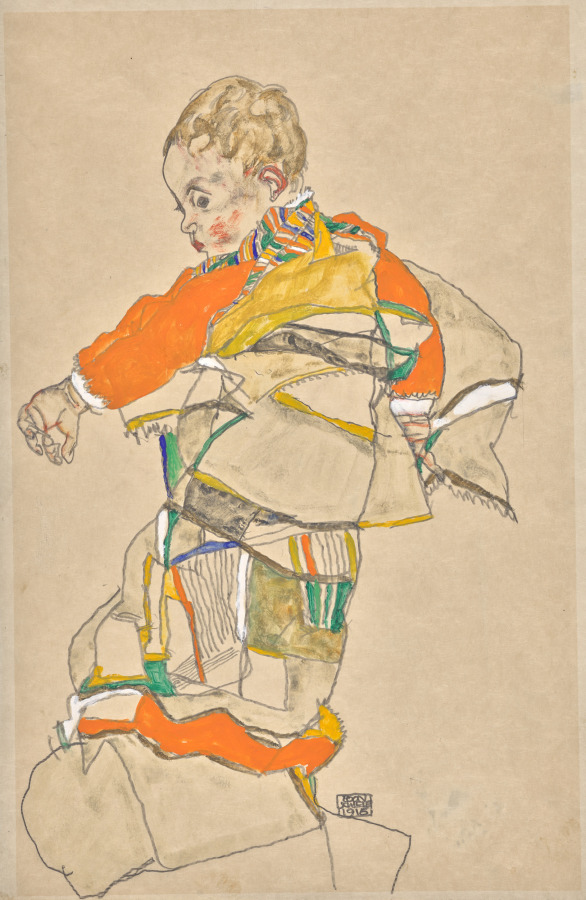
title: Portrait of a Child (Anton Peschka Jr.)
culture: Austria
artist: Egon Schiele (Austrian, 1890–1918)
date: 1916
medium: Gouache, watercolor, and graphite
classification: Drawing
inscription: signed, lower right, in graphite: egon / schiele 1916 [enclosed in a box]; verso, lower right, in graphite: Serena Lederer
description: Egon Schiele depicted a small child, the son of a friend, in this drawing devoid of setting. The child teeters at an awkward angle, seemingly unsupported but for a multipatterned fabric wrap that occupies the artist’s primary interest. This contorted pose is typical of Schiele’s many drawings of people in which he explored the expressive capacity of the human form, often using the body to indicate their psychic state (see another drawing by Schiele nearby). He died in the Spanish influenza epidemic in 1918 at age 28, leaving a vast number of drawings.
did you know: The child seen in this drawing, Anton Peschka Jr., served as a model for several compositions by Egon Schiele.